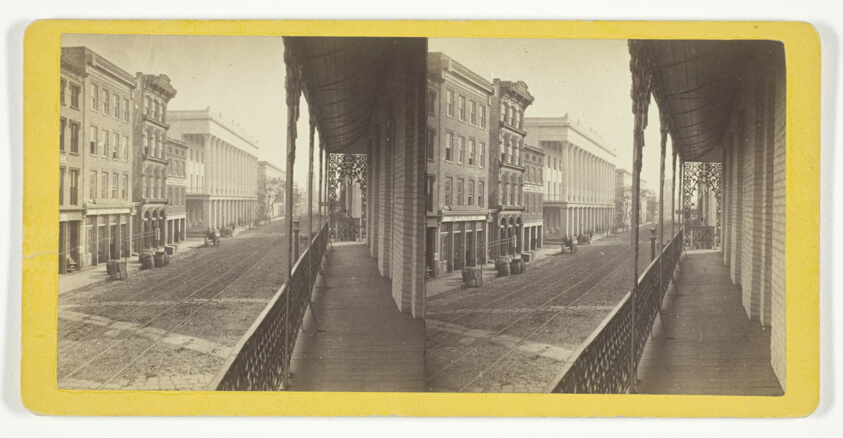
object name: Photograph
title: The Charleston Hotel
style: 19th century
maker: S.T. Souder (American, active late 19th century)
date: late 19th century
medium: Albumen print, stereo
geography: Charleston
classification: photography; photograph; albumen silver print; stereograph (albumen)